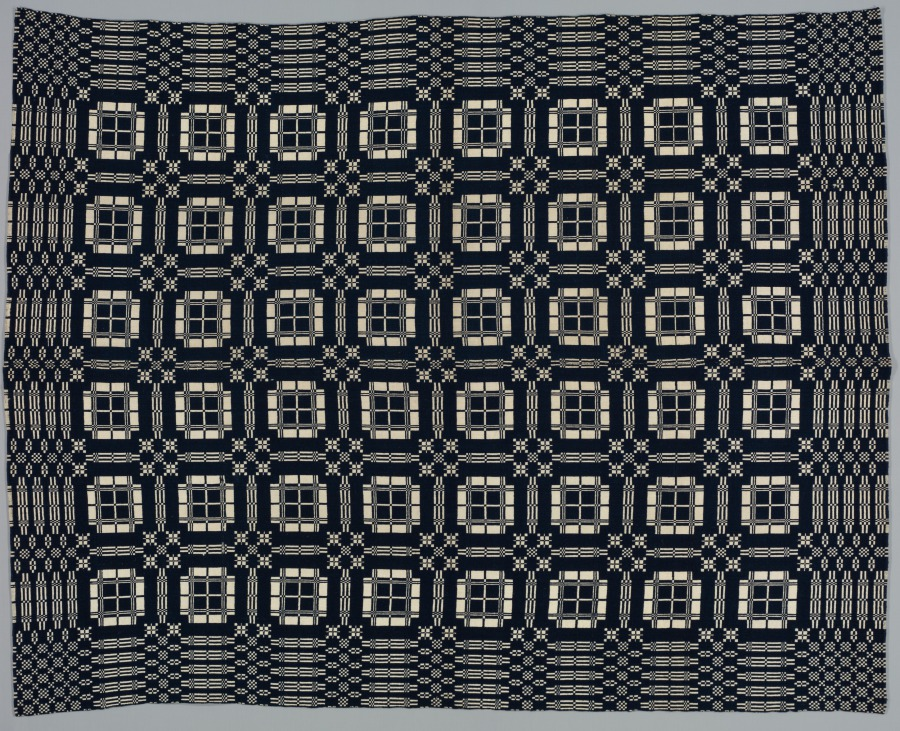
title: Coverlet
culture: America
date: 19th century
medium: wool and cotton; double cloth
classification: Textile